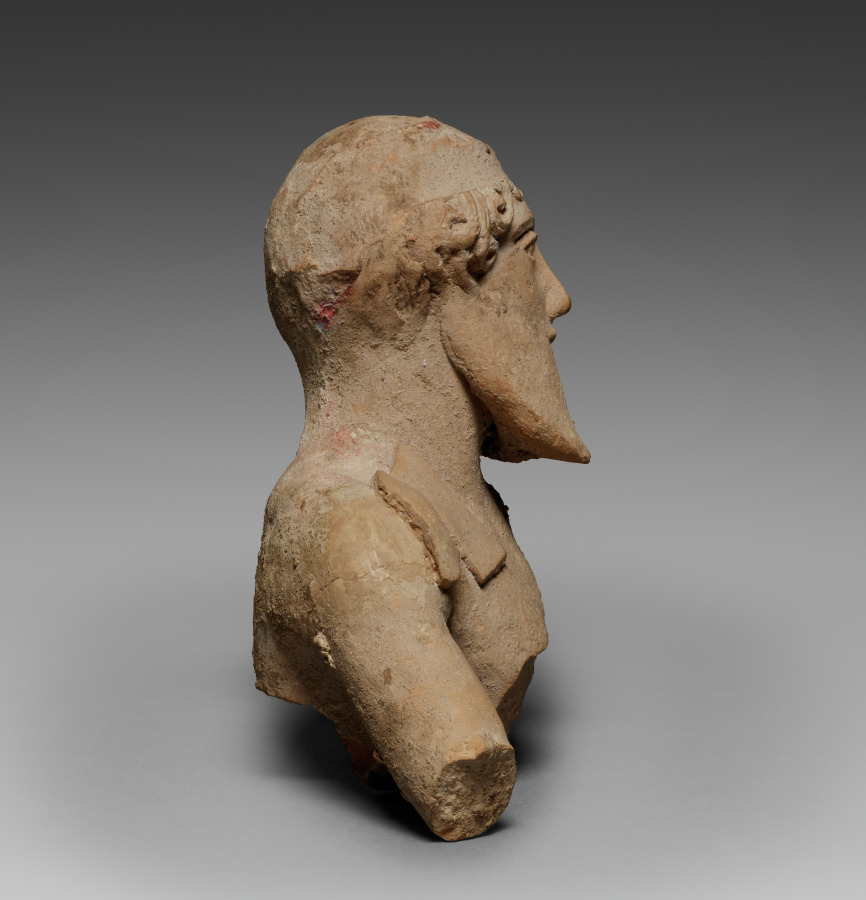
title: Fragment of a Reclining Male Figure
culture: Greek/South Italian, Taranto (ancient Taras)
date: 450–350 BCE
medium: terracotta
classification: Sculpture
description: This terracotta figure depicts a bearded man with his head tilted toward his left shoulder, suggesting that he is reclining. At Greek banquets, the attendees reclined while eating. Banquet imagery was very popular, including in the Greek colonies in Italy. This man likely originally had an elaborate headdress separately made and attached over the smooth part of the head. The clay on the figure’s right shoulder is probably the remains of “ribbons” attached to his headdress. There are traces of red pigment in the hair.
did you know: Tarantine terracotta banqueters were made from molds, with additional handmade details.